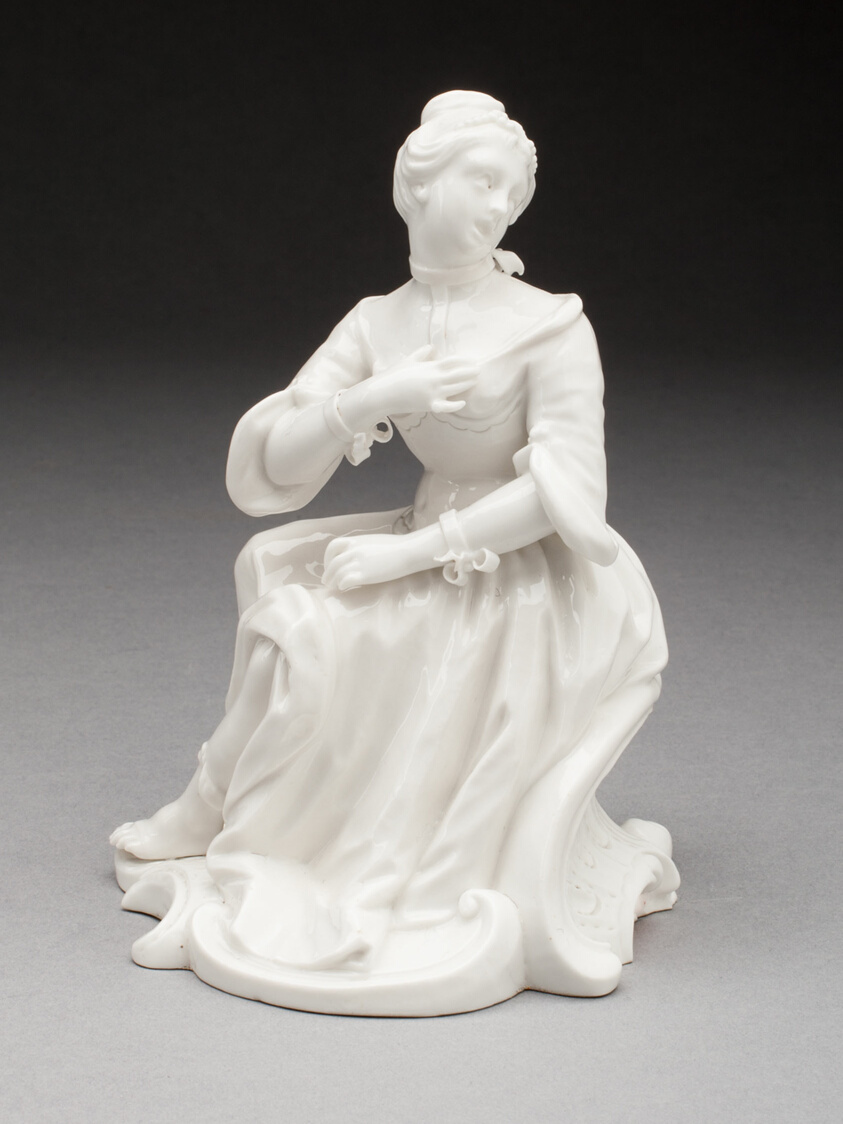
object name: Ceramics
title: Singer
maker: Modeler: Franz Anton Bustelli; German, born Switzerland, 1723-1763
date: c. 1775/85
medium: Hard-paste porcelain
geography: Germany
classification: sculpture; ceramics; porcelain; european decorative arts